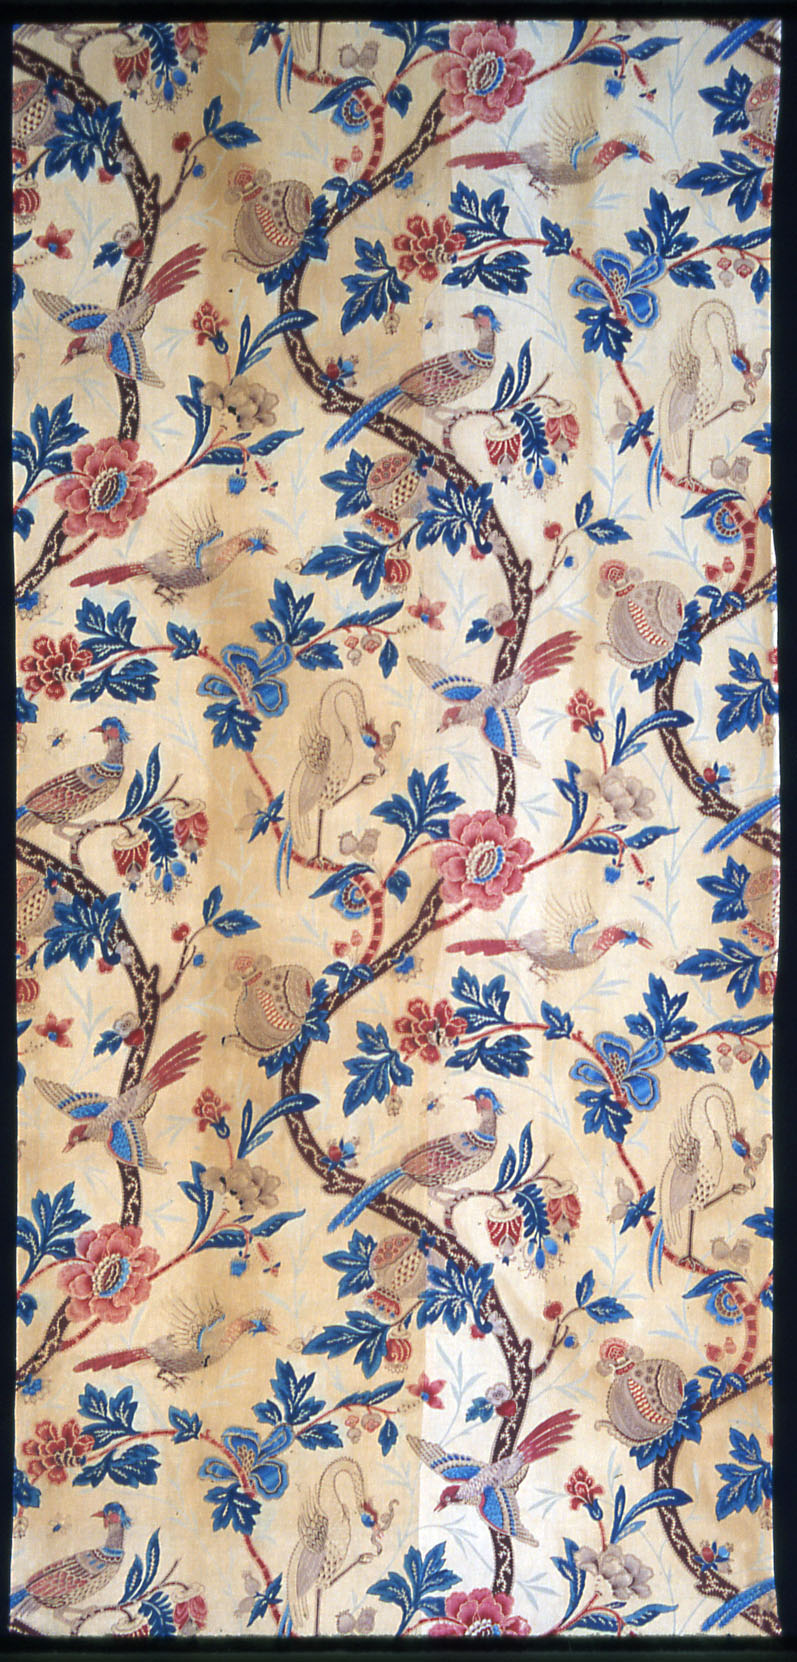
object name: Textile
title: Panel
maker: France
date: 1825/75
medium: Cotton, plain weave; block printed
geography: France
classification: textile; weaving - printed; printed textile